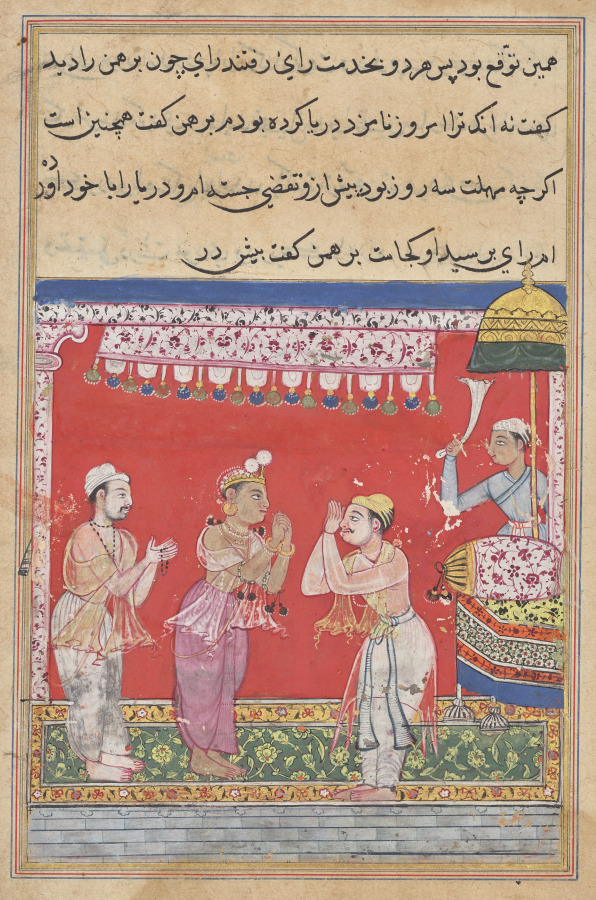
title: The king of the Ocean, having assumed human form, arrives at the court of the Raja, from a Tuti-nama (Tales of a Parrot): Eleventh Night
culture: Mughal India, court of Akbar (reigned 1556–1605)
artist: Ghulam 'Ali (Indian, active 1550s-1590s)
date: c. 1560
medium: gum tempera, ink, and gold on paper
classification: Painting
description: His hands raised in a gesture of respectful greeting, the Raja got down from his throne to welcome the king of the ocean, wearing a crown with white flowers. At the left, the Brahman holds a rosary in his hands. The raja wears the clothing and turban favored by Emperor Akbar: fine white muslin tunic with long points, pants, and a ready-tied flat turban. The king of the ocean is dressed like the Brahman, with a wrapped lower garment called a dhoti, and he wears a sacred thread over his left shoulder, which is the mark of a high-born Hindu.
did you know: The umbrella over the seat at the right marks the throne of the Raja.